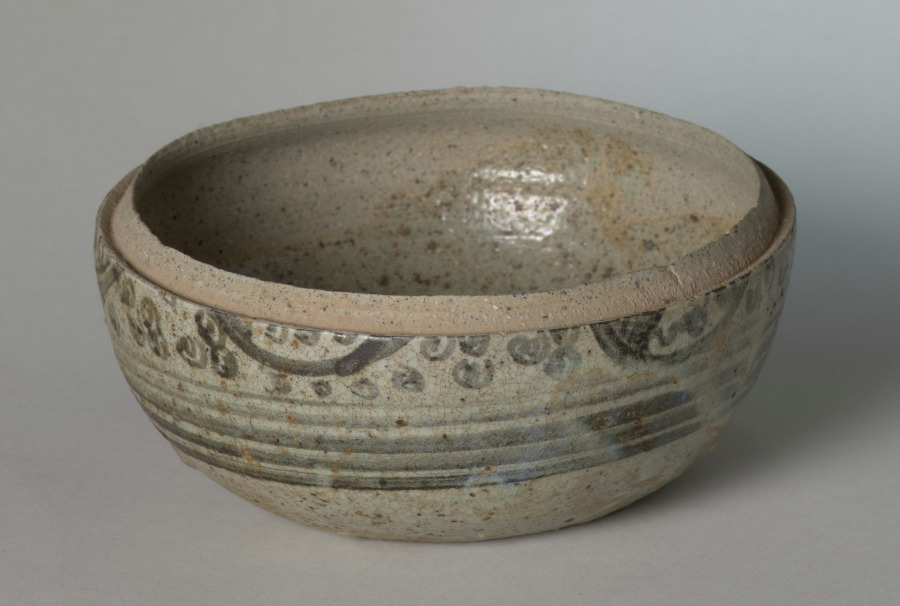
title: Covered Bowl with Painted Decoration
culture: Siam, Sawankhalok ware, 15th century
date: 1400s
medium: stoneware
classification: Ceramic